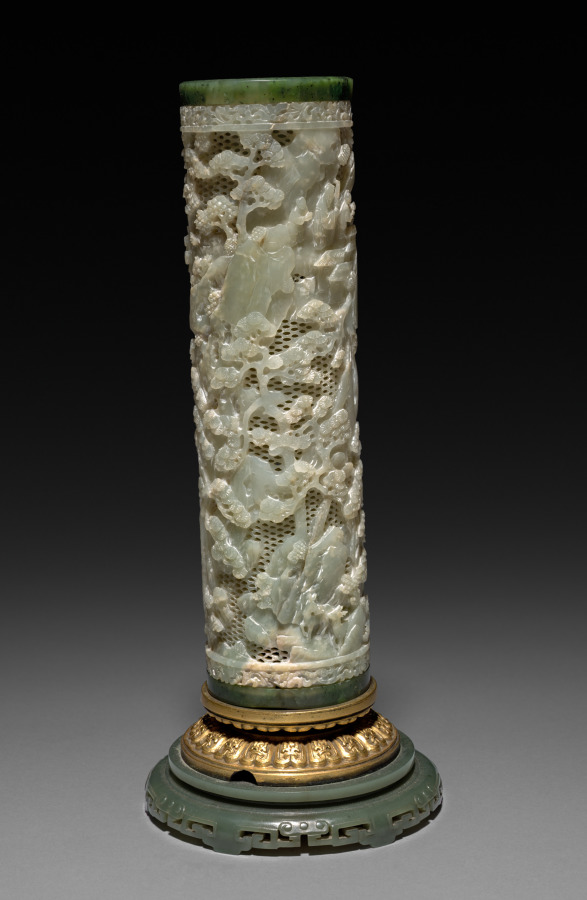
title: Cylinder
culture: China, Qing dynasty (1644-1911) or Republican period (1912-49)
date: 1800–1940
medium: jade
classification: Jade